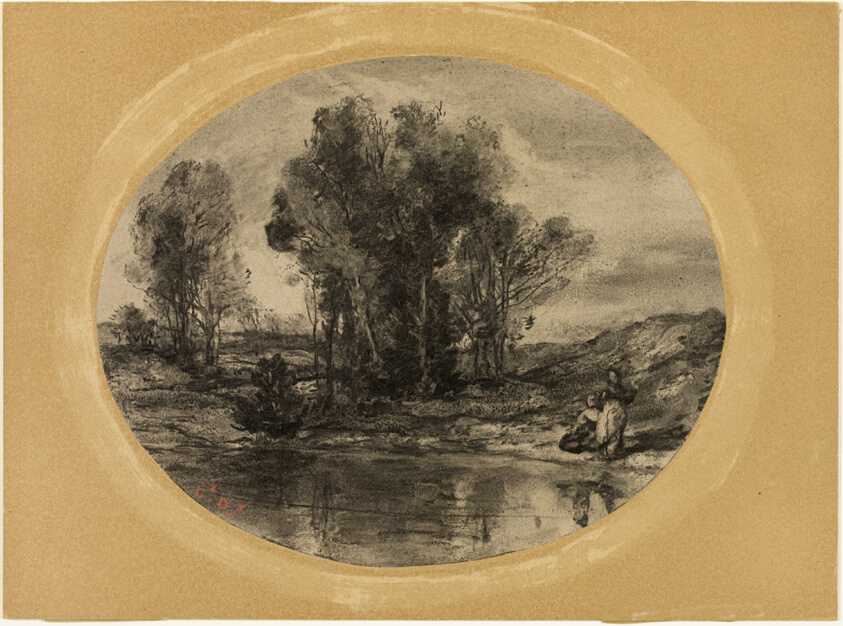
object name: Drawing and Watercolor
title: Figures by a Pond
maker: Henri Joseph Constant Dutilleux (French, 1807-1865)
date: 1855/60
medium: Charcoal, with stumping, scraping, and erasing, on buff wove paper, laid down on tan cardboard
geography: France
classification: charcoal; drawings (visual works); prints and drawing